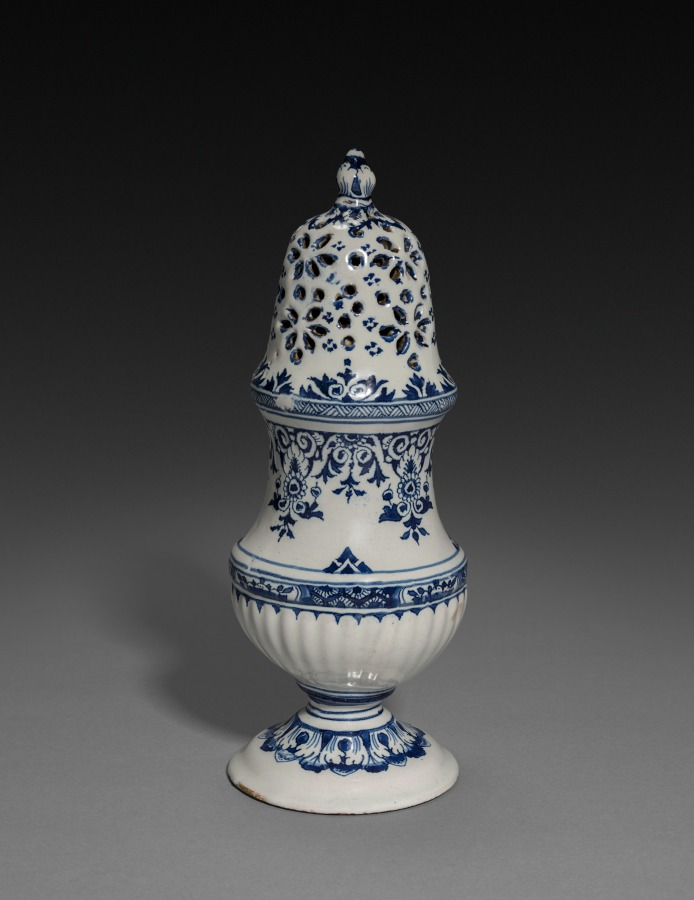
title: Sugar Caster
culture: France, Moustiers(?), early 18th century(?)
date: early 1700s ?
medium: faience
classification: Ceramic